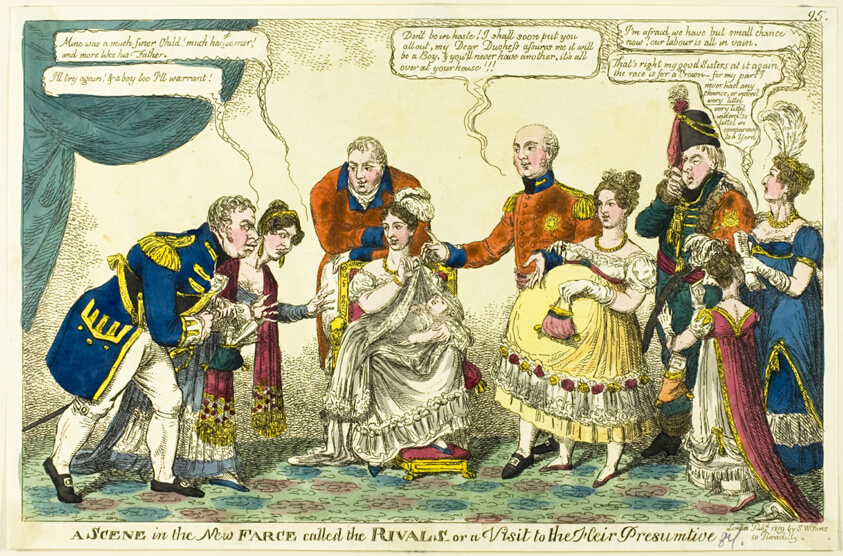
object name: Print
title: A Scene in the New Farce Called The Rivals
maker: Charles Williams (English, active 1797-1830); published by S. W. Fores (English,1785-1825)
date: 1819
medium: Hand-colored etching on ivory laid paper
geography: England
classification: engraving; print; prints and drawing